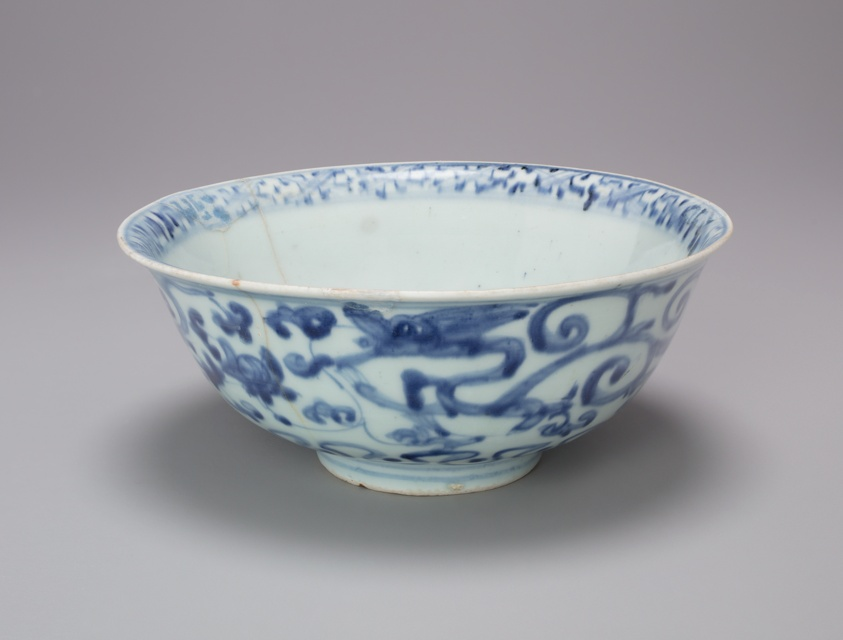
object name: Vessel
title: Bowl with Everted Rim and Scrollwork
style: annamese, vietnamese, Southeast Asian, asian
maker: Vietnam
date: 15th century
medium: Glazed stoneware with cobalt-blue underglaze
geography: Vietnam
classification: ceramics; asian art; vessel